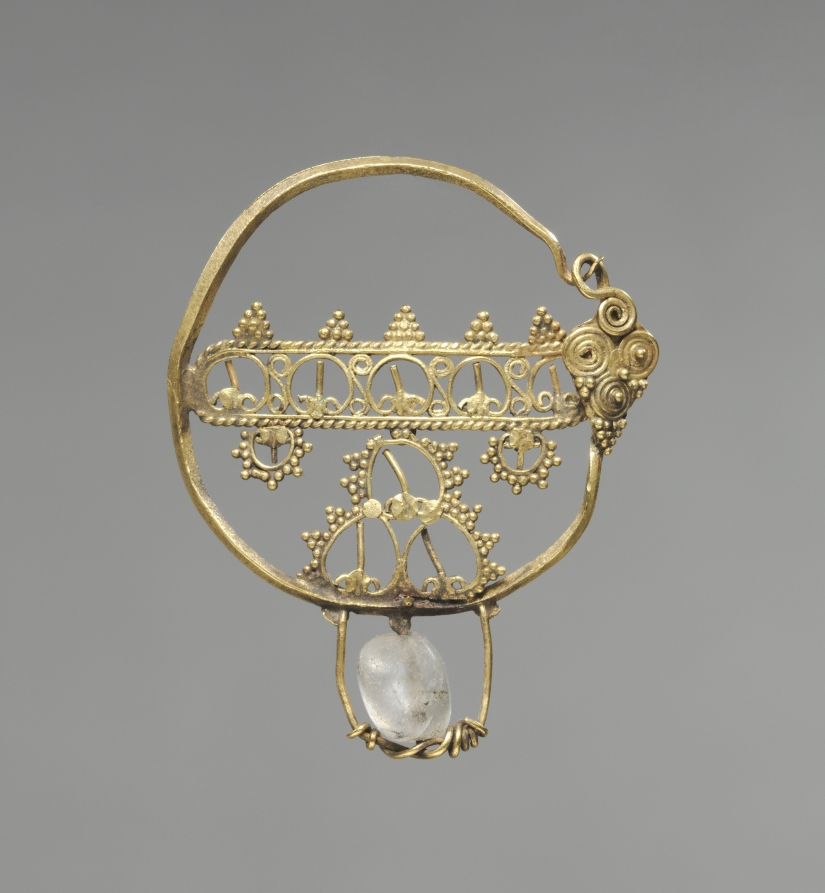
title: Earring with Openwork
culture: Byzantium, early Byzantine period, 7th-9th Century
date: 600–800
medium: gold with a rock crystal bead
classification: Jewelry